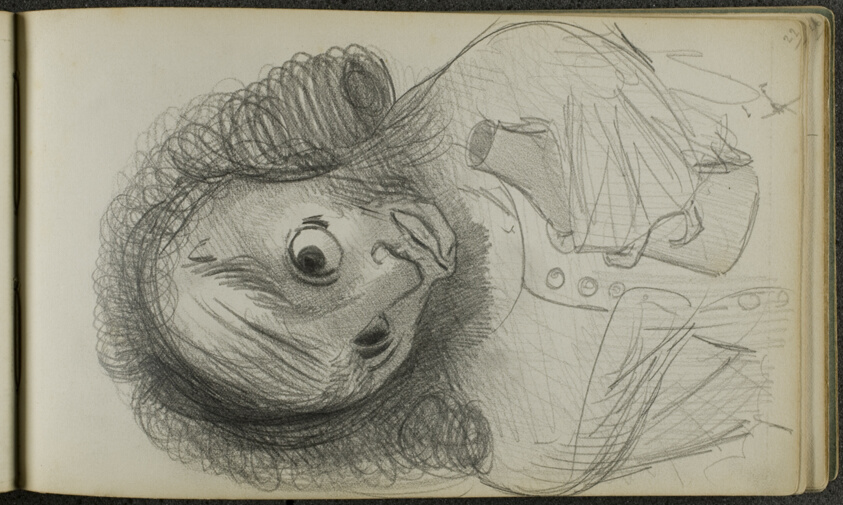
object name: Book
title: Sketchbook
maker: Odilon Redon (French, 1840-1916)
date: c. 1879–85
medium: 55-page sketch book of drawings in pencil on cream wove (with a few buff and blue) paper, with (simulated) laid paper interleaves, bound in black cardboard with black fabric taping on spine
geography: France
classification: sketchbook; graphite; prints and drawing; book; paper